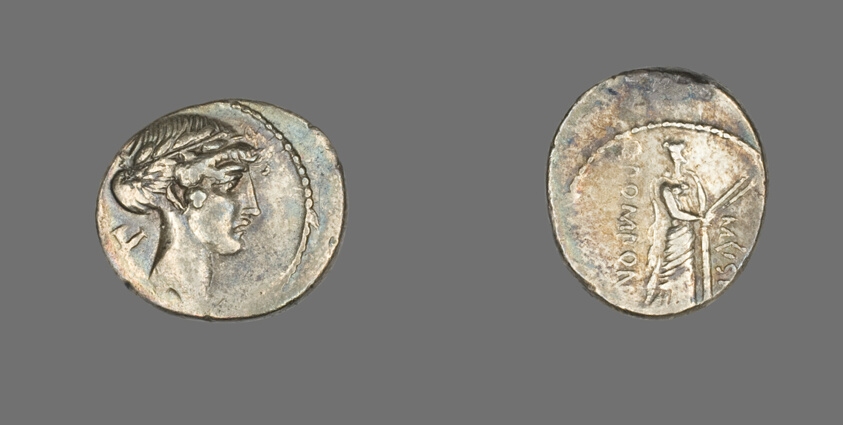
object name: Coin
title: Denarius (Coin) Depicting the God Apollo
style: roman (ancient, style or period), ancient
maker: Roman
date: 66 BCE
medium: Silver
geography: Roman Empire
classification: coin; ancient art